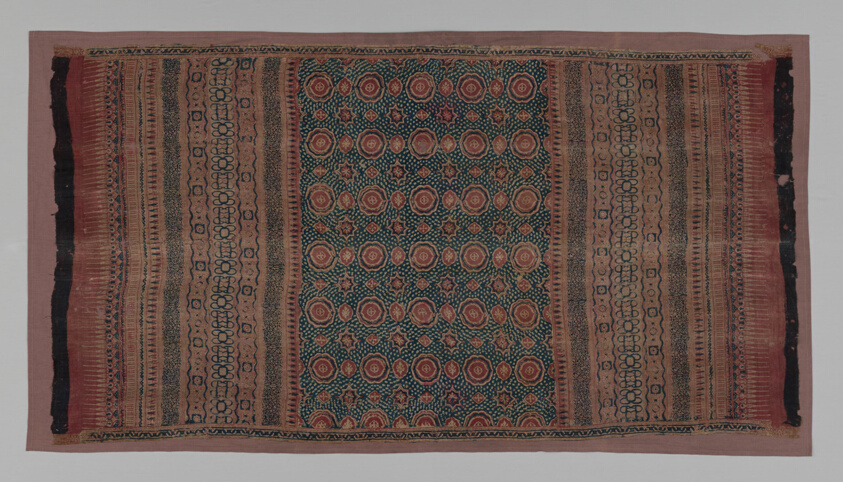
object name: Textile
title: Heirloom Textile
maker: India, Gujarat; Found in the Toraja area of Sulawesi, Indonesia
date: 17th/18th century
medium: Cotton, plain weave, block printed and resist-dyed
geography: India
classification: textile; weaving; weaving - printed